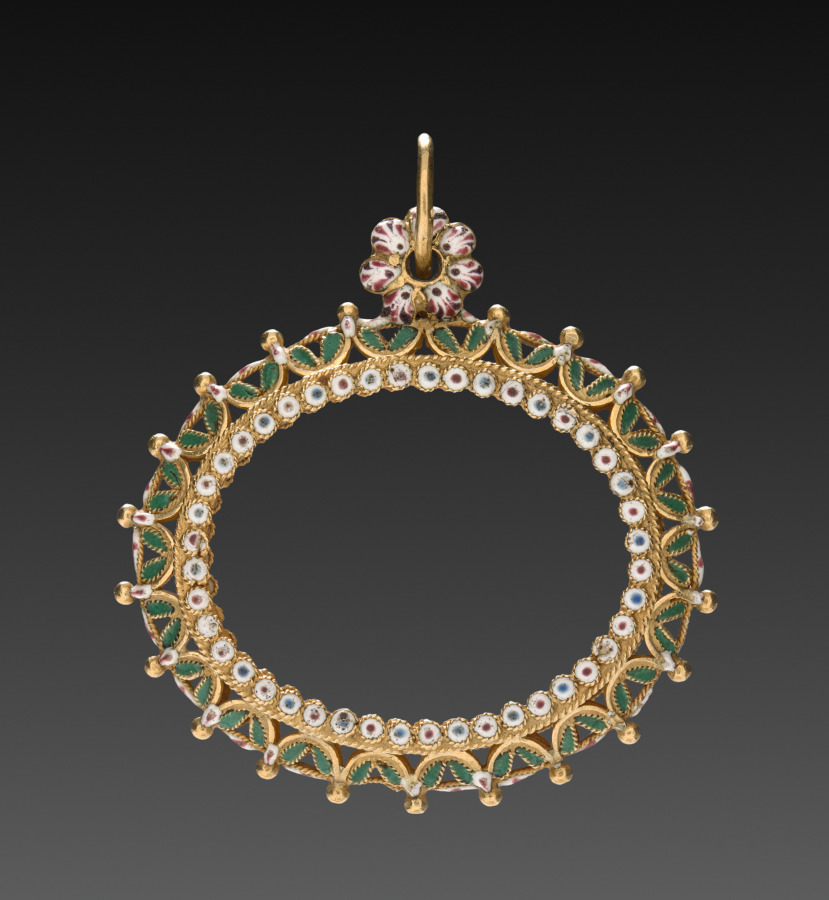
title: Pendant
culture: Spain, late 17th century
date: late 1600s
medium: gold and enamel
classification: Jewelry